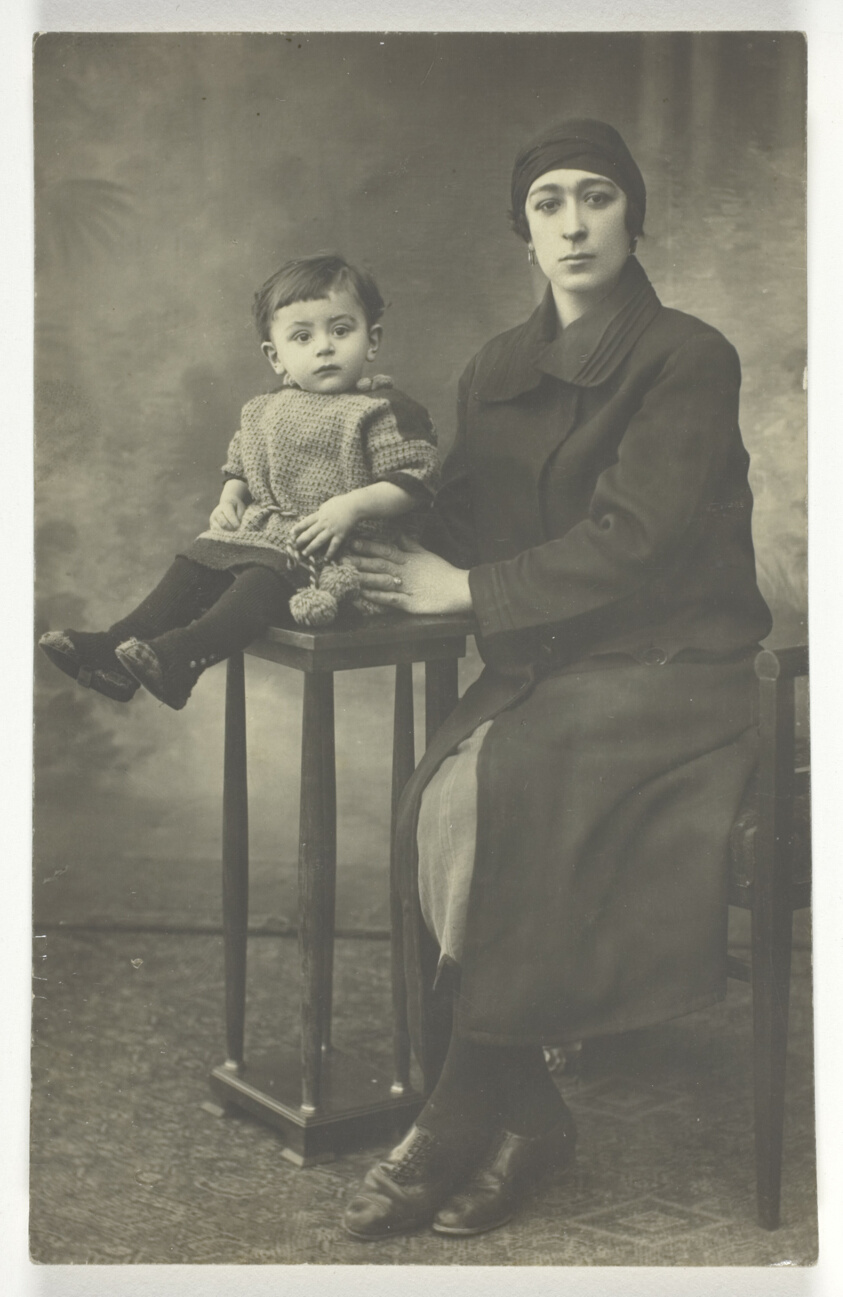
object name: Photograph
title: Untitled Postcard (Woman with Boy on Stand)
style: 19th century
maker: Artist unknown; Probably French, 19th century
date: 1873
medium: Gelatin silver print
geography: France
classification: photograph; photography